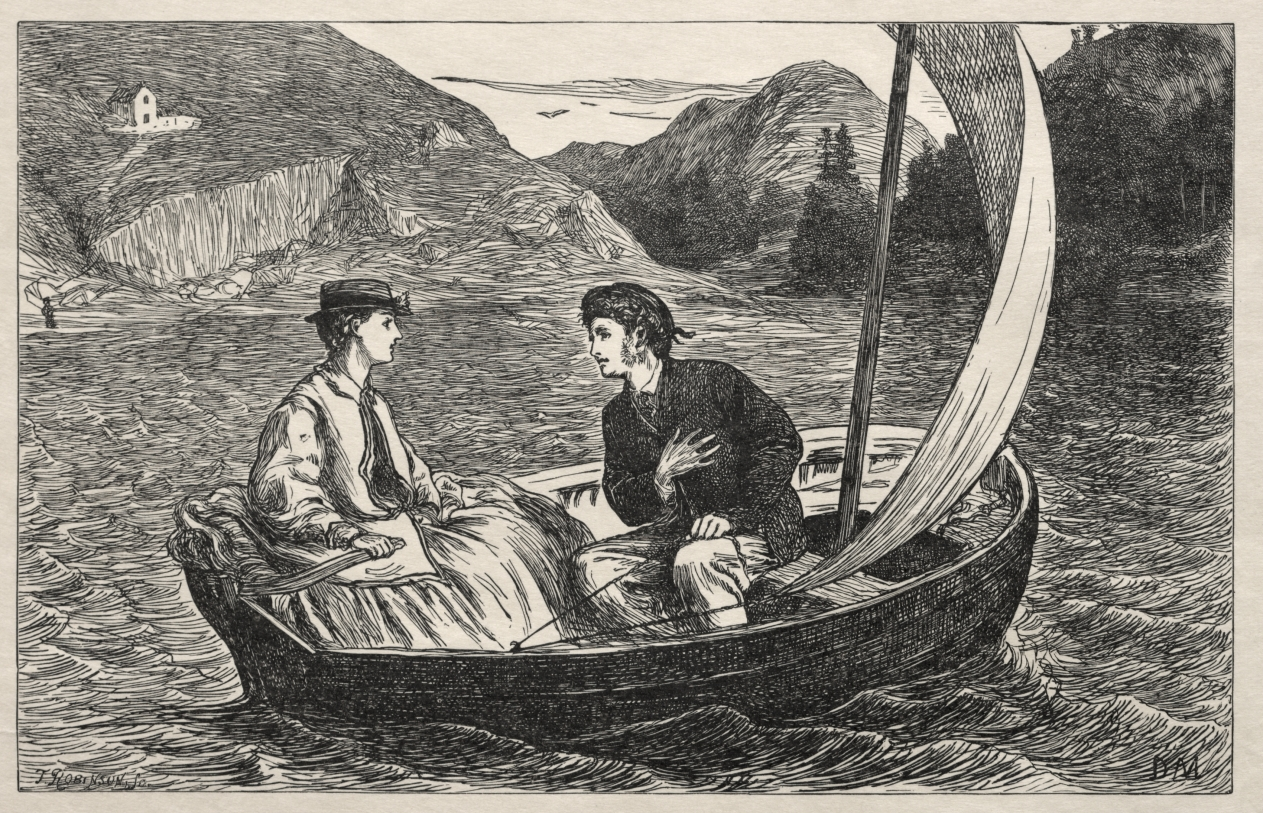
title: Try for a Tutorship - A Critical Moment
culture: England, 19th century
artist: George Louis Palmella Busson Du Maurier (British, 1834–1896)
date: 1865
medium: wood engraving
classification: Print